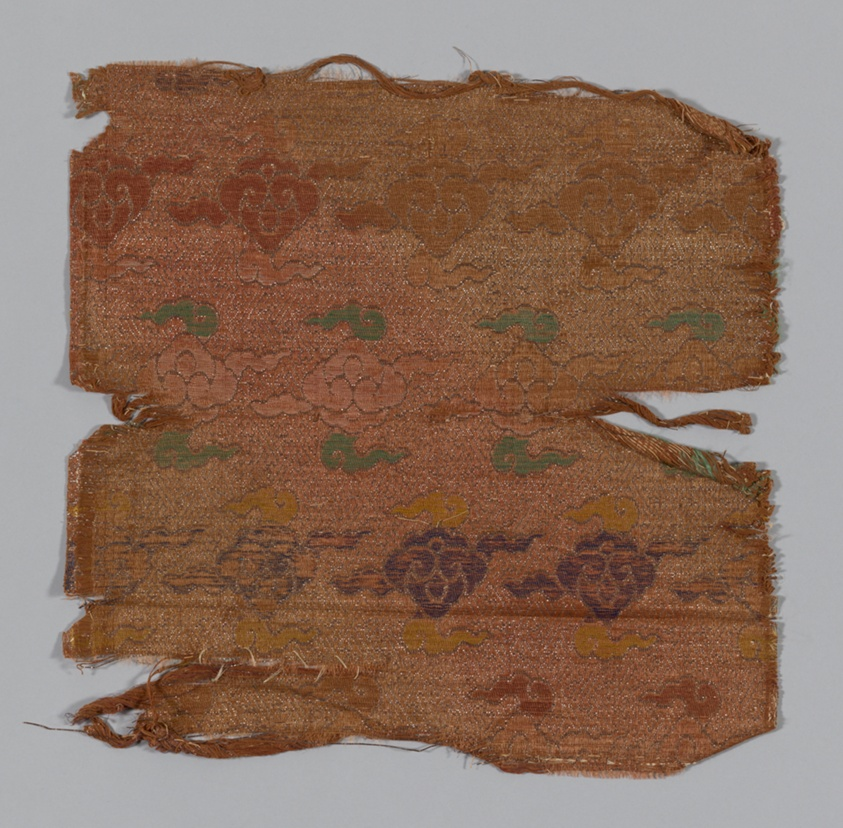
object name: Textile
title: Fragment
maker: China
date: Late 17th/early 18th century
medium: Plain compound satin, silk and silvered paper; 1 1.2 strips to m.m., heavy cotton filling, white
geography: China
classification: textile; weaving